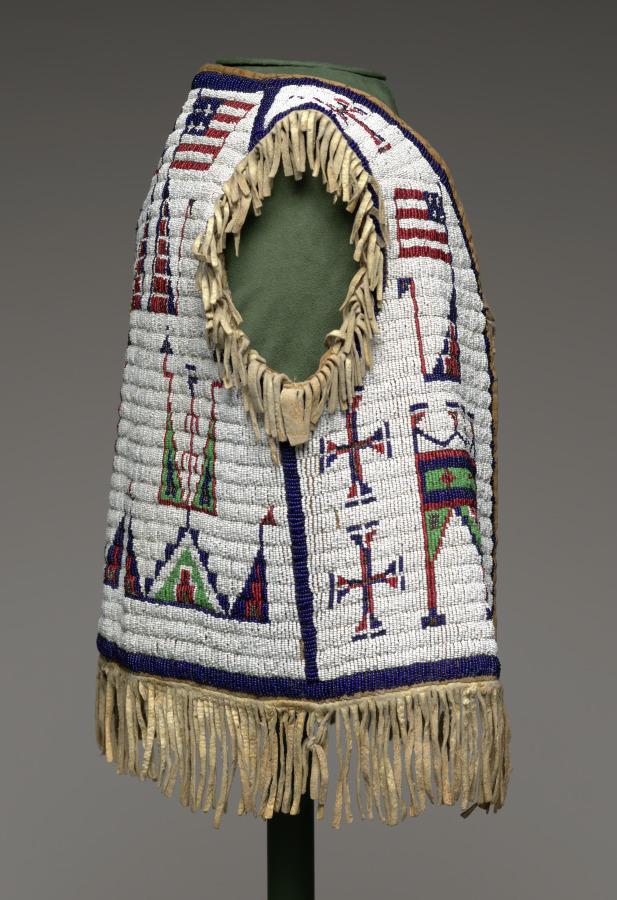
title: Boy's Vest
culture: Plains, Lakota (Sioux), 19th century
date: c. 1880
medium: beadwork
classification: Garment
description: For centuries, beautiful garments and objects have held great meaning for the native groups of the Great Plains. For instance, the Lakota (Sioux) ceremonially intone something sacred wears me. That is, humans don powerful garments but are worn, animated, and protected by the sacred forces within their materials and imagery. By 1700 European Americans began to make their presence felt in the region, and Plains people creatively adopted European materials and garment types into their wardrobes. By 1870 most Plains people had been forced onto reservations, and traditional life shattered—especially for men. The garments on display here all were made after that date.